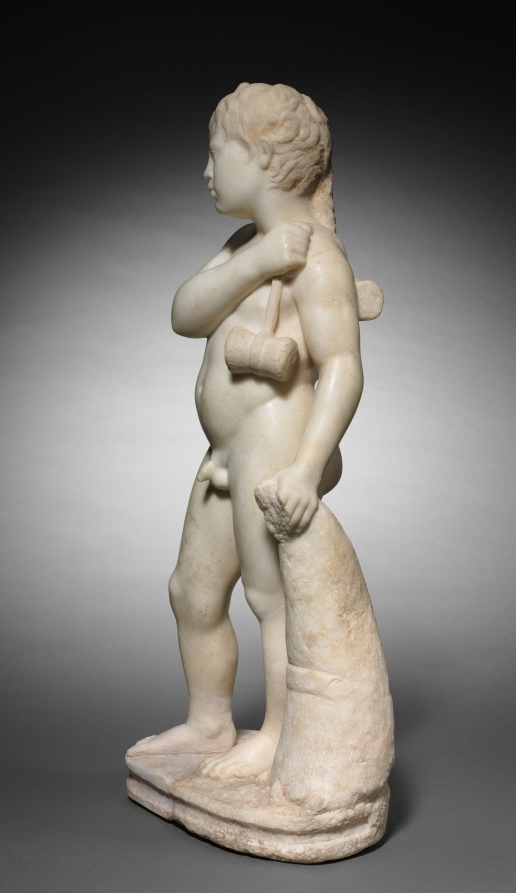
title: Youth with Jumping Weights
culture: Italy, Rome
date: c. 40–70 CE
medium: marble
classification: Sculpture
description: The hourglass-shaped jumping weights slung over his shoulder, together with the animal-skin punching bag on which he leans, characterize this youth as an athlete. The distinctive haircut, short with one long tress in back, may indicate a childhood vow, perhaps to be trimmed in a future ceremony. Several very similar sculptures exist in other collections, suggesting the existence of a single prototype, now lost.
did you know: The lower right leg and foot of this sculpture do not survive, and have been reconstructed.